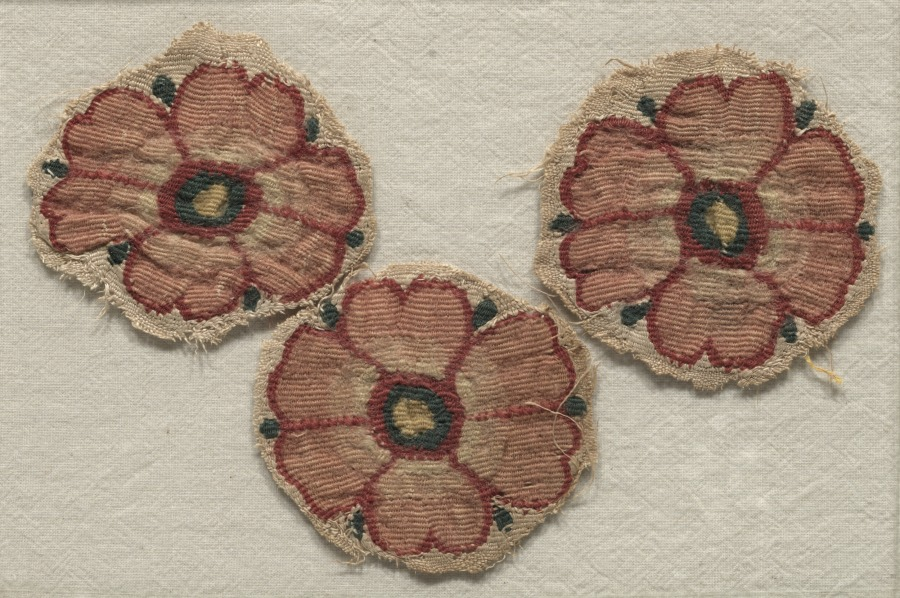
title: Fragments from a Curtain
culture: Egypt, Byzantine period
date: 300s–500s CE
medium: tapestry (originally inwoven in tabby ground, applied to plain tabby linen); linen and wool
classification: Textile